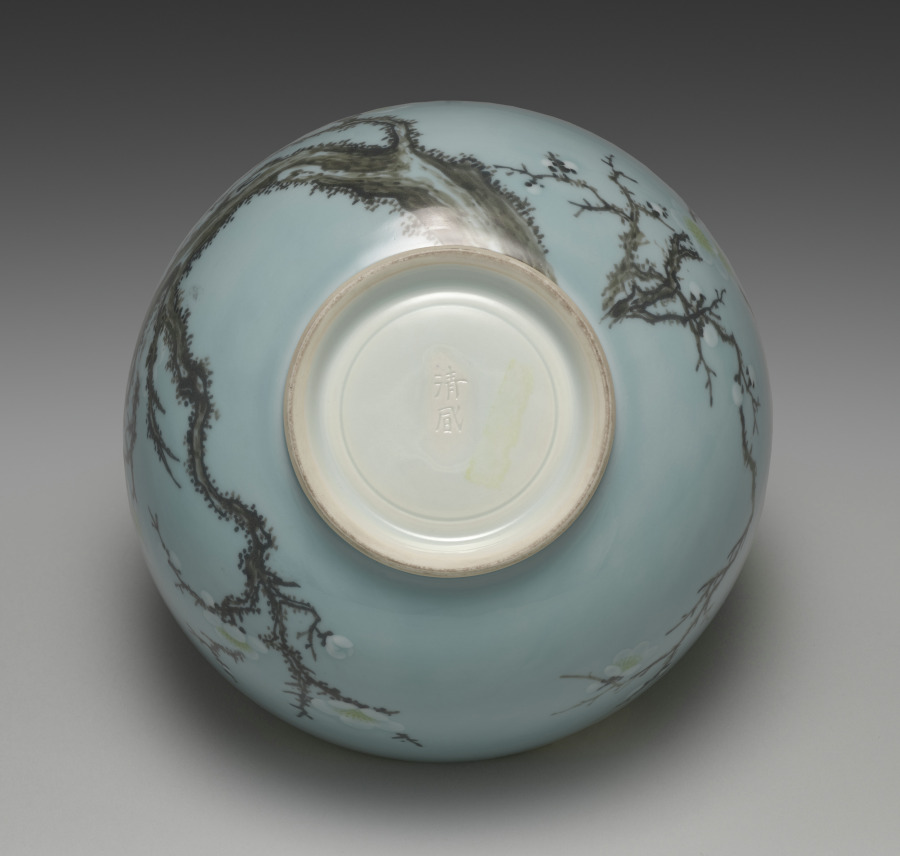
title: Sweets Bowl with Plum Tree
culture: Japan, Taishō period (1912–26) to Shōwa period (1926–89)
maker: Seifū Yohei IV (Japanese, 1872–1951)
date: 1914–46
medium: Porcelain with underglaze color and modeled design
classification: Ceramic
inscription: 清風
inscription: 清風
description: In Chinese culture, the plum symbolizes the virtue of perseverance. For his sweets bowl based on Qing dynasty (1644–1911) Chinese prototypes, Seifū Yohei IV first painted the gnarled boughs of a plum tree in iron oxide on the surface. Then he made the tree’s blossoms slightly raised by building up slip, or liquified clay. He painted their centers yellow. Before applying the blue glaze, he covered the blossoms with paper so that they remained white.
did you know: Broad access to high-quality Chinese ceramics occasioned by the collapse of the Qing dynasty (1644–1911) and the dispersal of elite Chinese collections presented Seifū Yohei IV with models for both molded decoration and painted motifs.